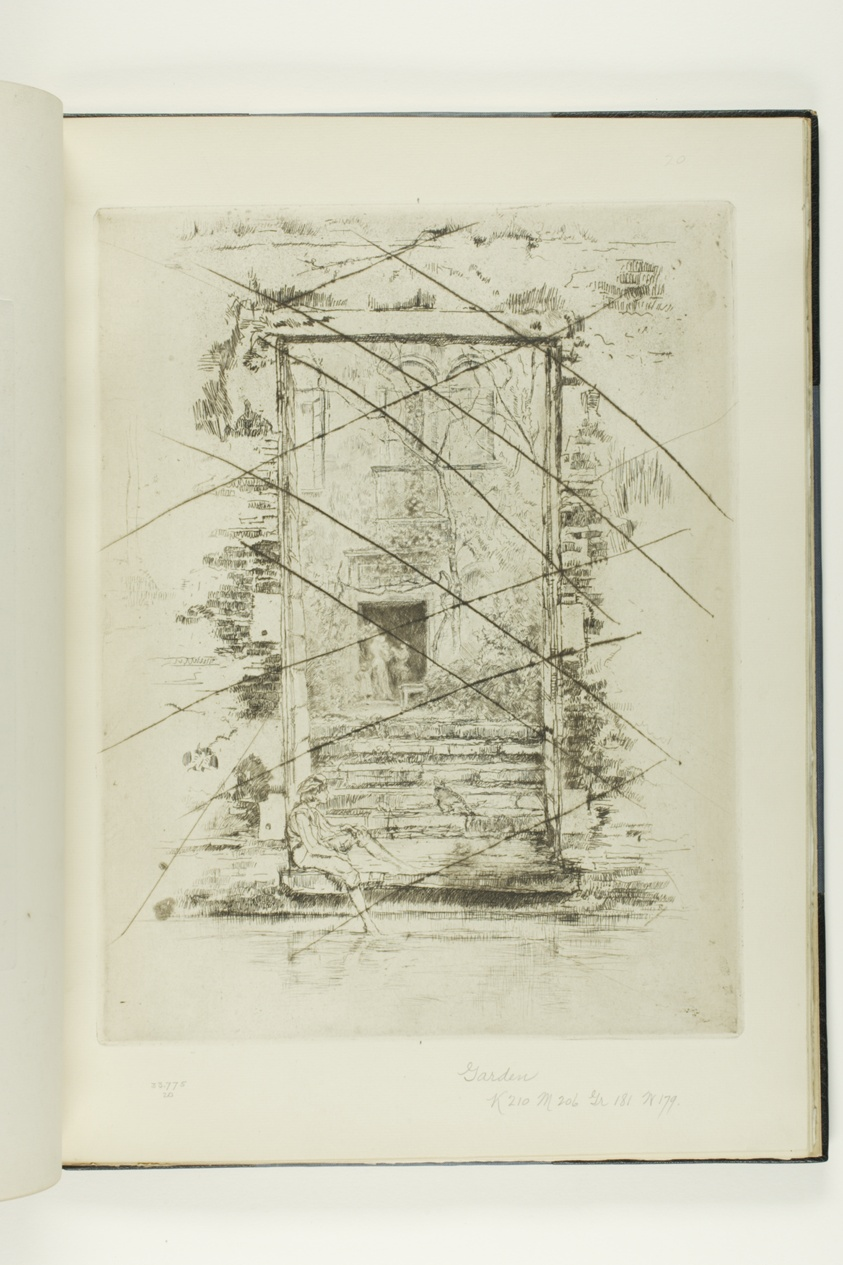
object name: Print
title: The Garden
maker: James McNeill Whistler (American, 1834-1903)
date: 1879/80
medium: Etching and drypoint with foul biting, with drypoint cancellation, in black ink on ivory laid paper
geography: United States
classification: etching; prints and drawing; print; foul biting; drypoint; book; paper